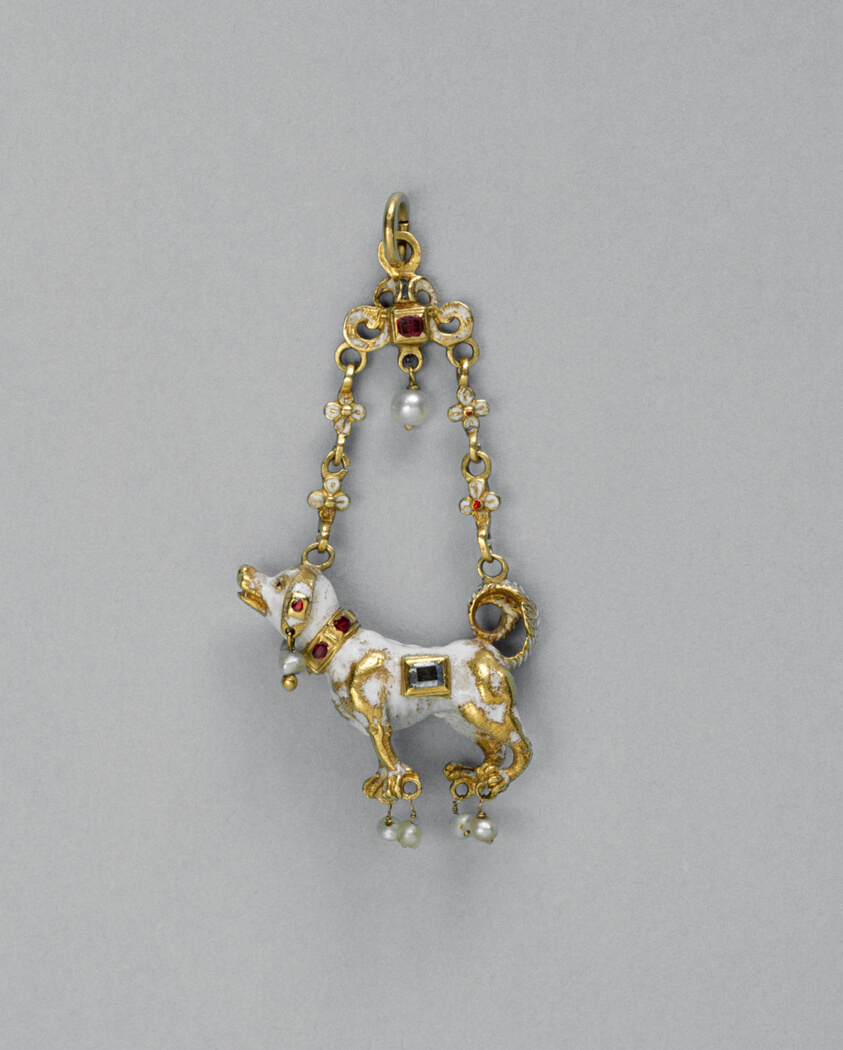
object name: Costume and Accessories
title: Pendant Shaped as a Dog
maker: Spanish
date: c. 1575-c. 1625, with later modifications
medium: Gold, enamel, diamond, rubies, and pearls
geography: Spain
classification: pendant (jewelry); jewelry; european decorative arts; costume